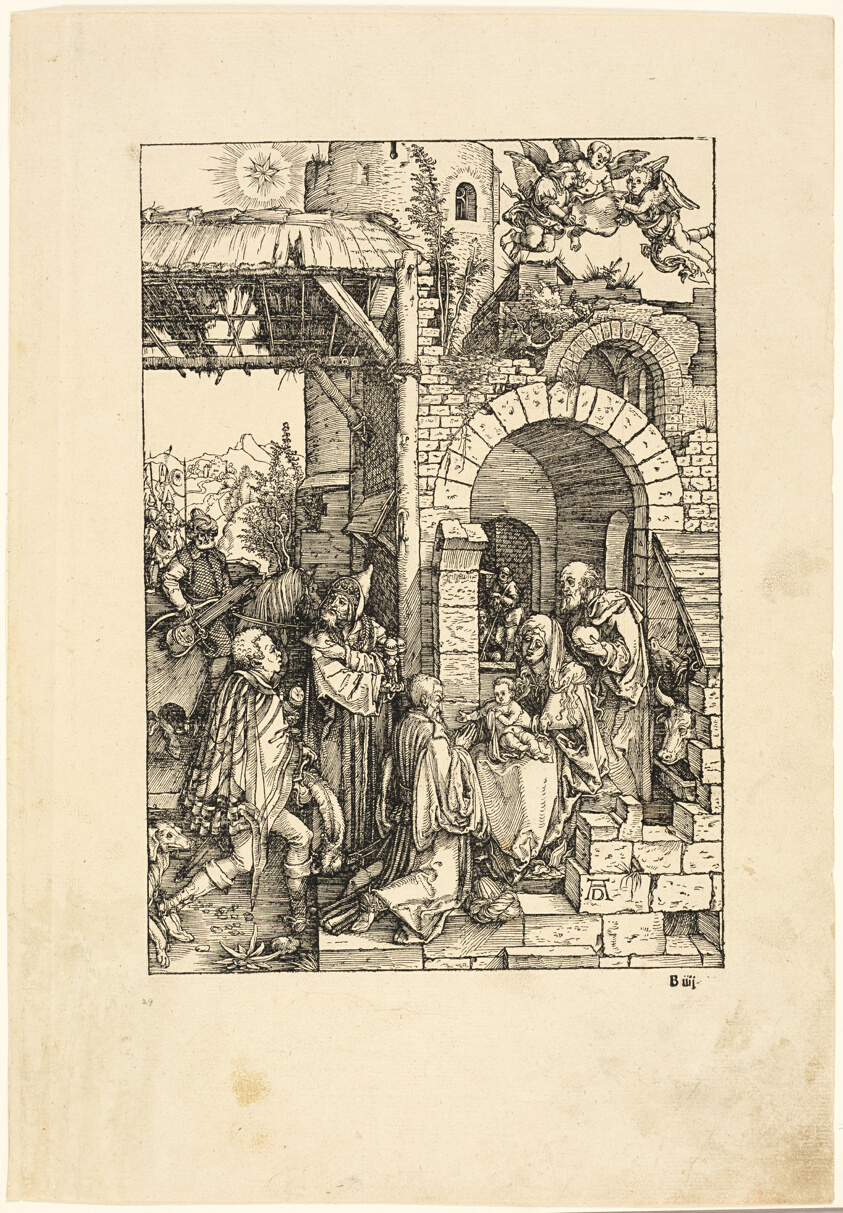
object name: Print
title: The Adoration of the Magi, from The Life of the Virgin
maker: Albrecht Dürer (German, 1471-1528)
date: c. 1503, published 1511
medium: Woodcut in black on tan laid paper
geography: Germany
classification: woodcut; print; prints and drawing; paper